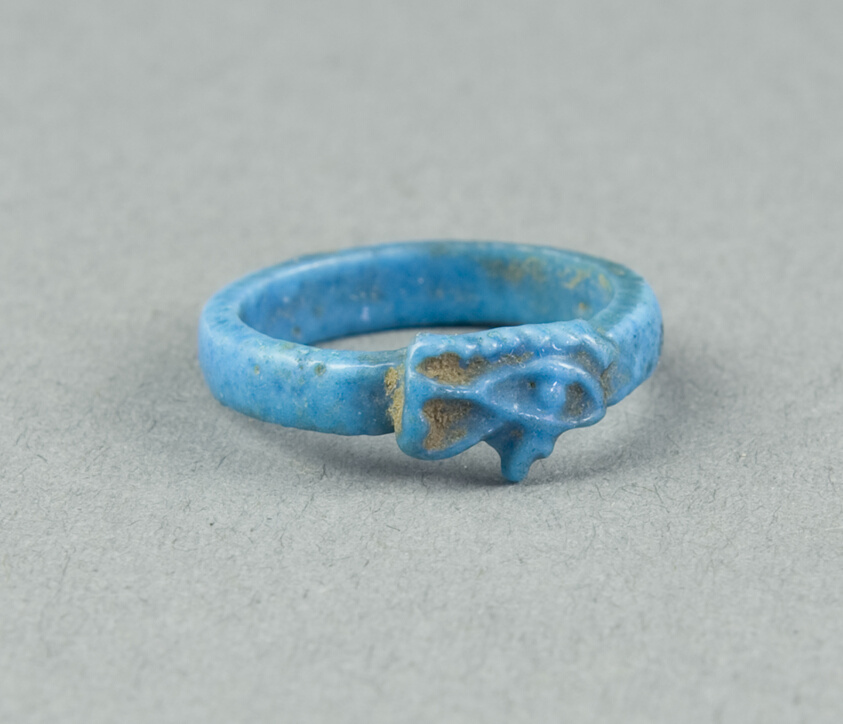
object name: Costume and Accessories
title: Eye of Horus (Wedjat) Finger Ring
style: new kingdom, egyptian, ancient, eighteenth dynasty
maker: Egyptian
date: New Kingdom, late Dynasty 18 (about 1325 BCE)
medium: Faience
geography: Egypt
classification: ring (jewelry); ceramics; jewelry; ancient art; costume; faïence (composite material)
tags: eye of Horus